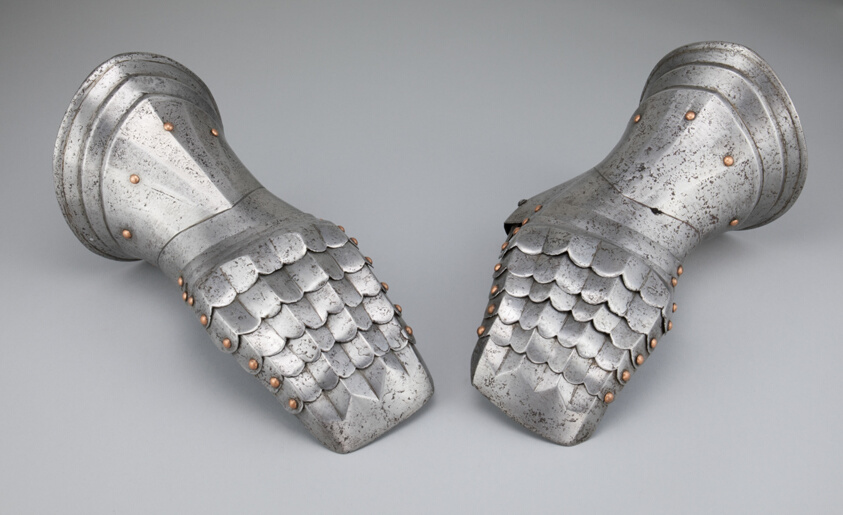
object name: Armor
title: Pair of Mitten Gauntlets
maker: Flemish or Spanish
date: c. 1500/20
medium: Steel, leather, and copper alloy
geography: Flanders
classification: suit-gauntlet; armor; arms and armor